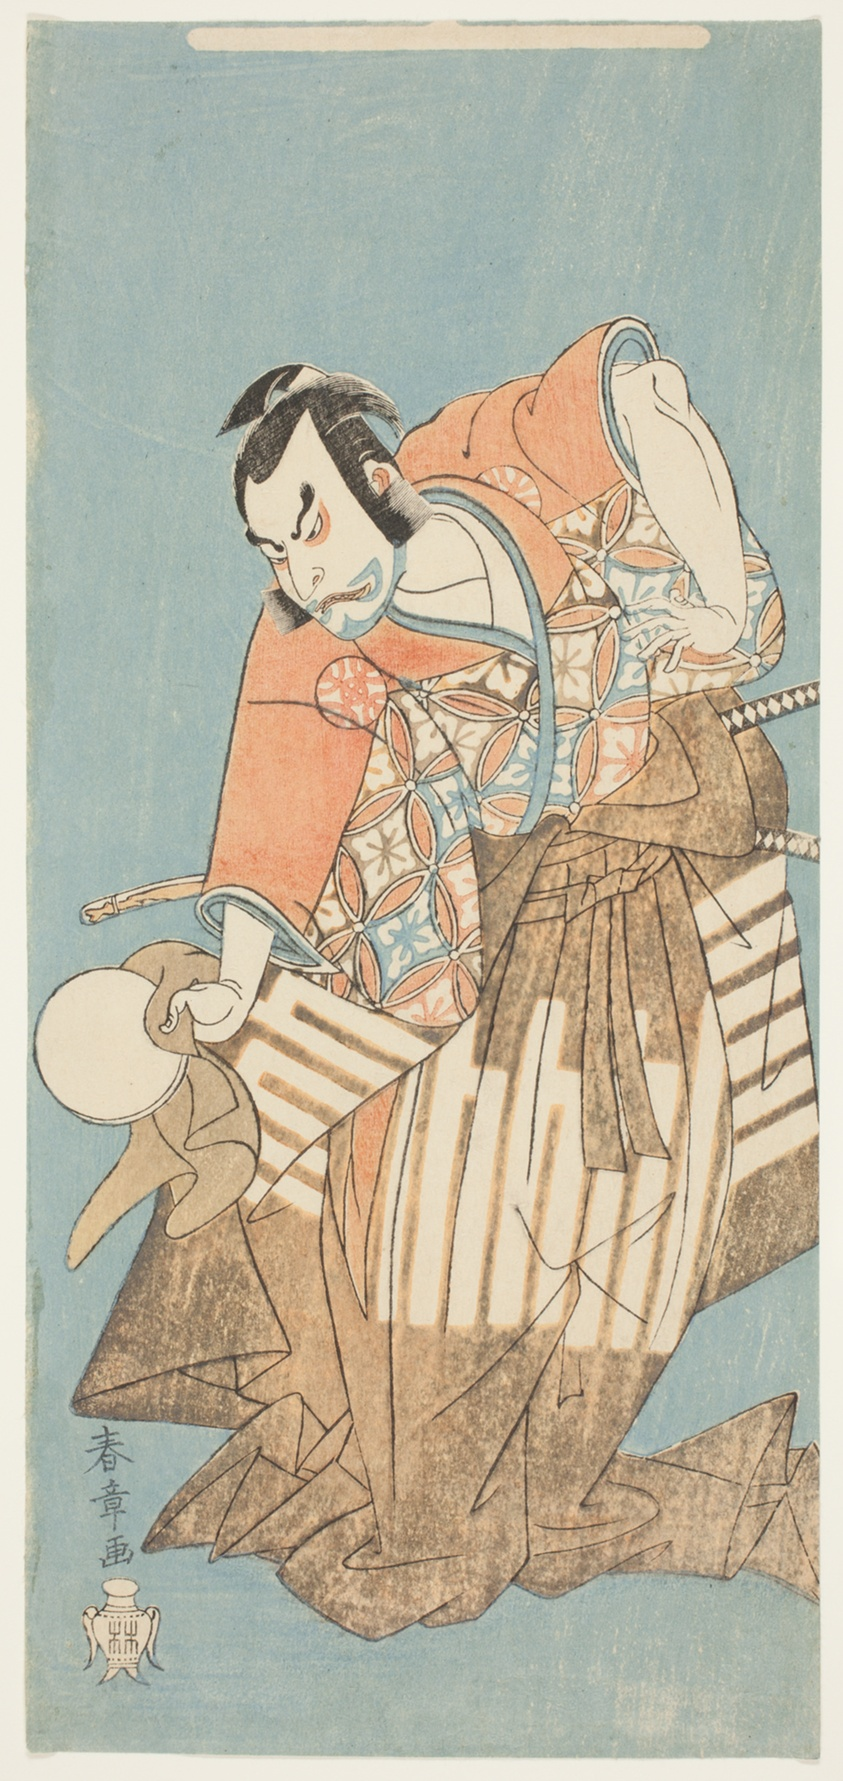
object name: Print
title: Actor Nakamura Nakazô I as Osada no Tarô in The Genji Clan Now at Its Zenith (Ima o sakari suehiro Genji)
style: Japanese (culture or style)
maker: Katsukawa Shunshô 勝川 春章; Japanese, 1726-1792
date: About 1768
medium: Color woodblock print; hosoban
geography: Japan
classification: woodblock print; print; asian art